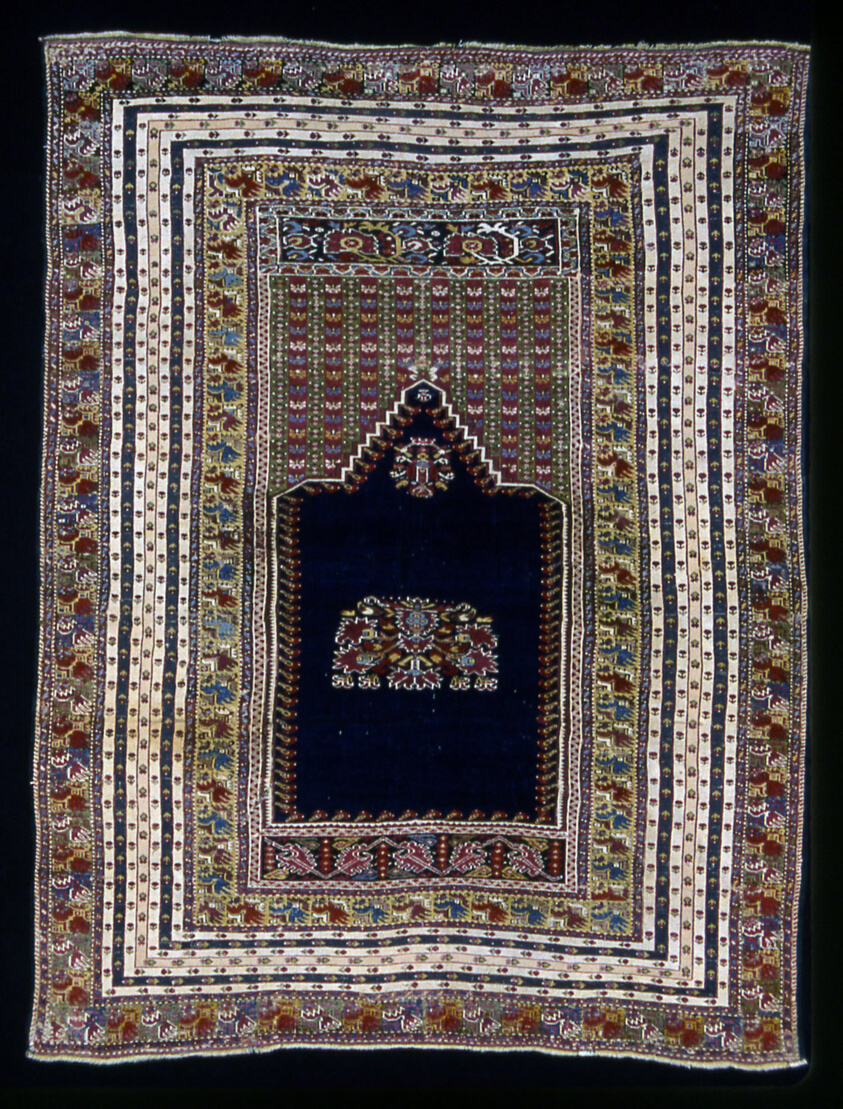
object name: Textile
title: Prayer Carpet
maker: Turkey, Anatolia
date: 1875/1900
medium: Wool and cotton, plain weave with supplementary wrapping wefts forming cut solid pile through a technique known as "Ghiordes knots"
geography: Turkey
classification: textile; weaving - carpet